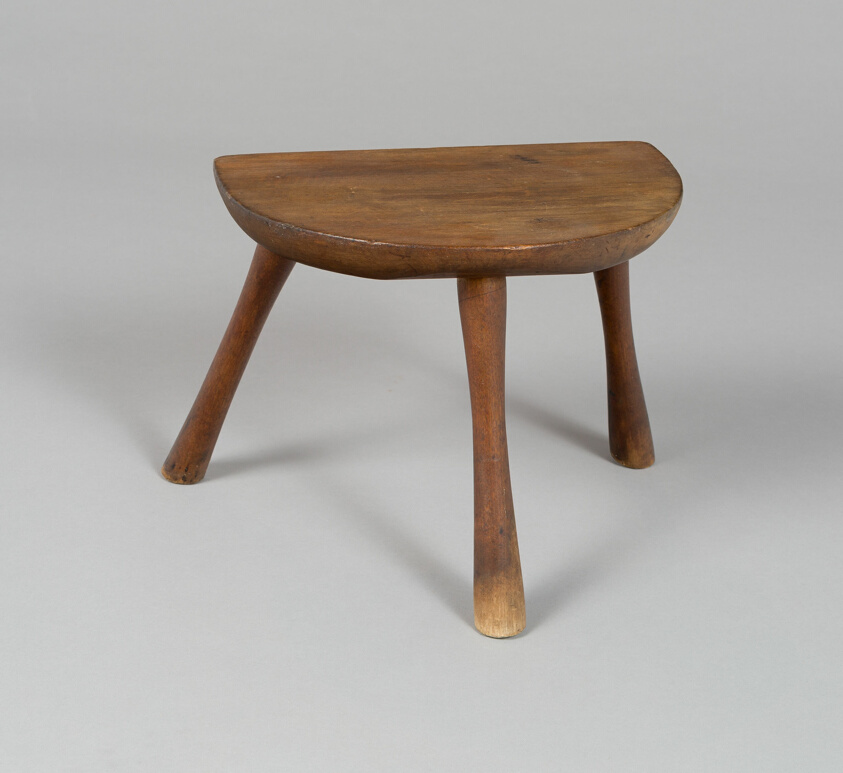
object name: Furniture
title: Milking Stool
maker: Shaker Colony; American, 19th century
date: 1841–60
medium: Maple and pine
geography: United States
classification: seating; furniture; american decorative arts; american arts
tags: furniture